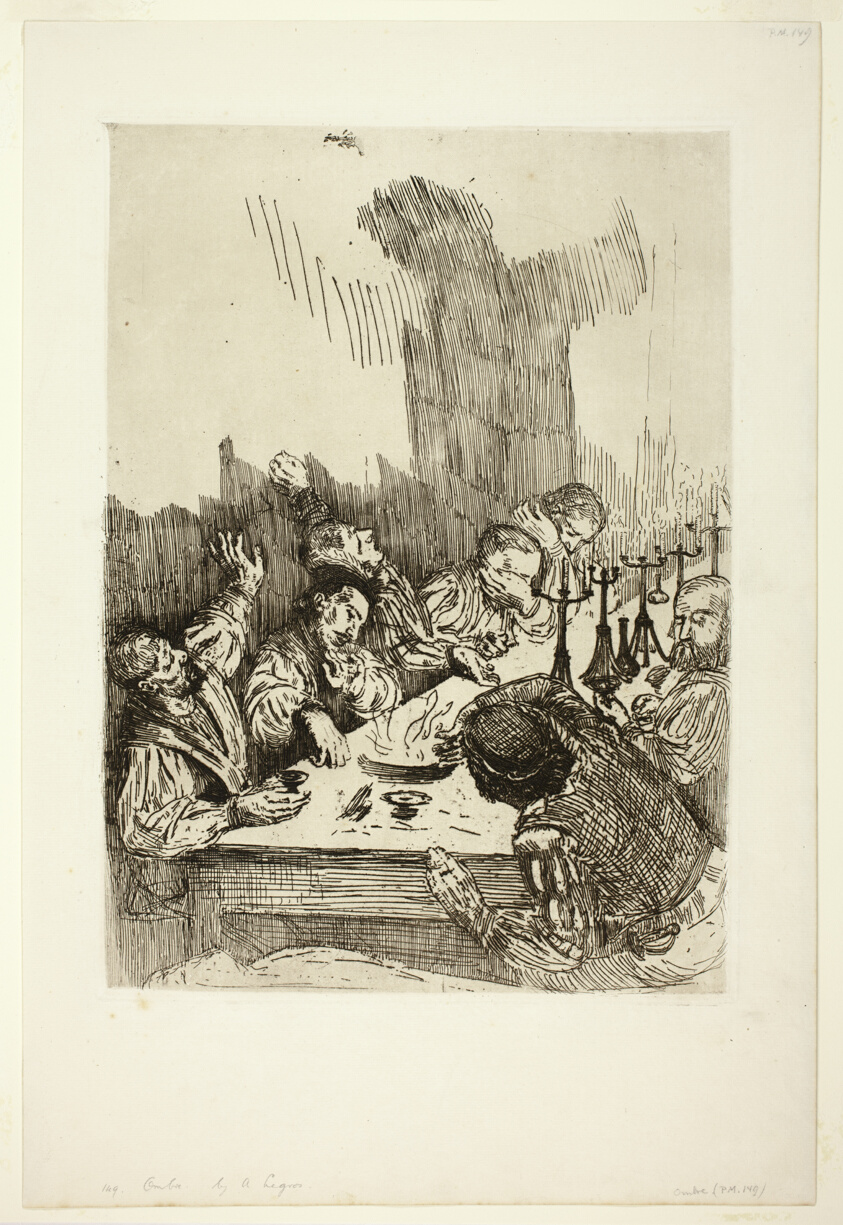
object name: Print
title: The Shadow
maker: Alphonse Legros (French, 1837-1911)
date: 1861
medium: Etching with foul biting and plate tone in warm black on ivory laid paper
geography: France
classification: etching; print; prints and drawing